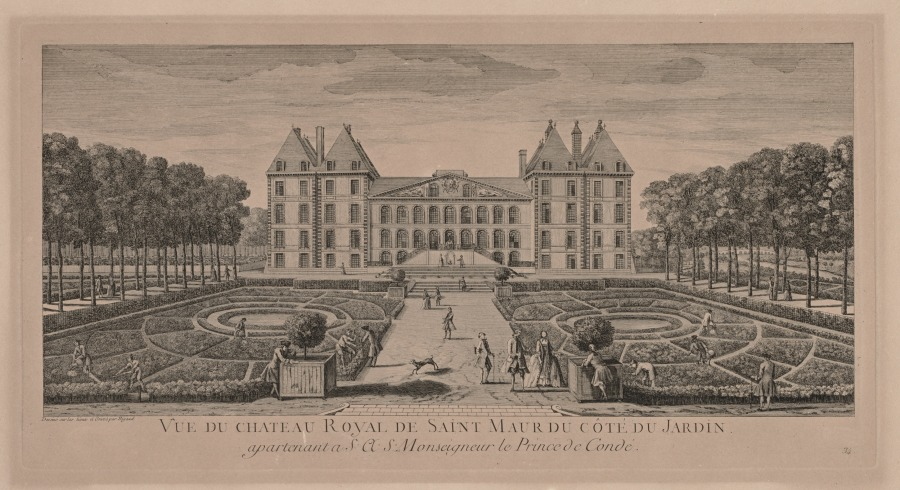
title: Chateau St. Maur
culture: France, 18th century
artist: Jacques Rigaud (French, 1681–1754)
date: c. 1720–50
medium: engraving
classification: Print